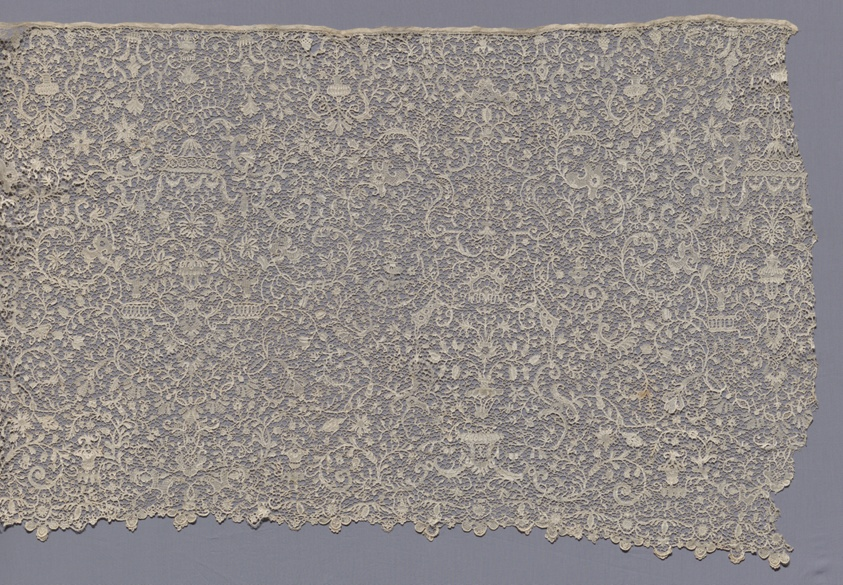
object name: Textile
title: Flounce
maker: France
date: c. 1700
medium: Linen, needle lace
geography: France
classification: textile; lace - needle